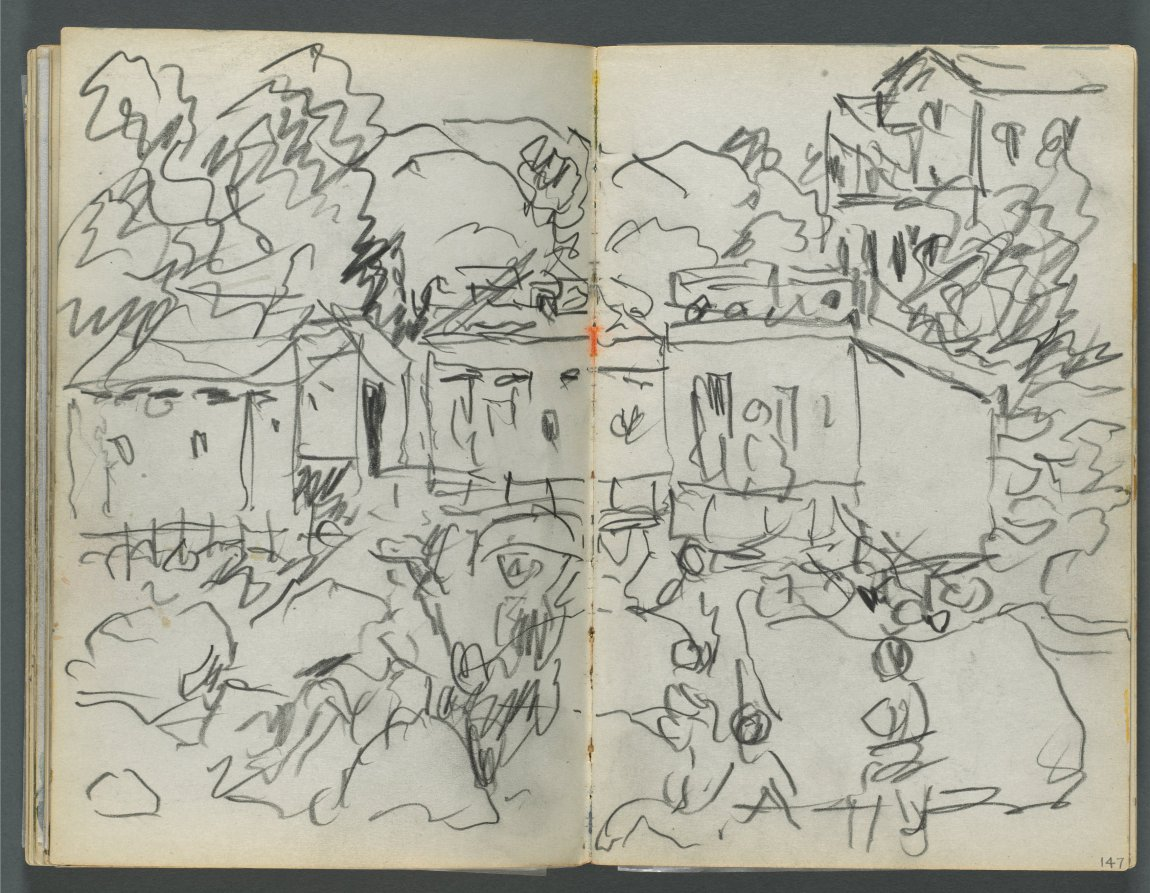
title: Sketchbook, The Dells, N° 127, page 146 & 147: Landscape with figures and buildings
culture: America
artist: Maurice Prendergast (American, born Newfoundland [now Canada], 1858–1924)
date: c. 1919–1921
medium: graphite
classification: Bound Volume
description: This sketchbook contains 59 pages of graphite drawings and 16 watercolors made at various locations on Cape Ann, Massachusetts.